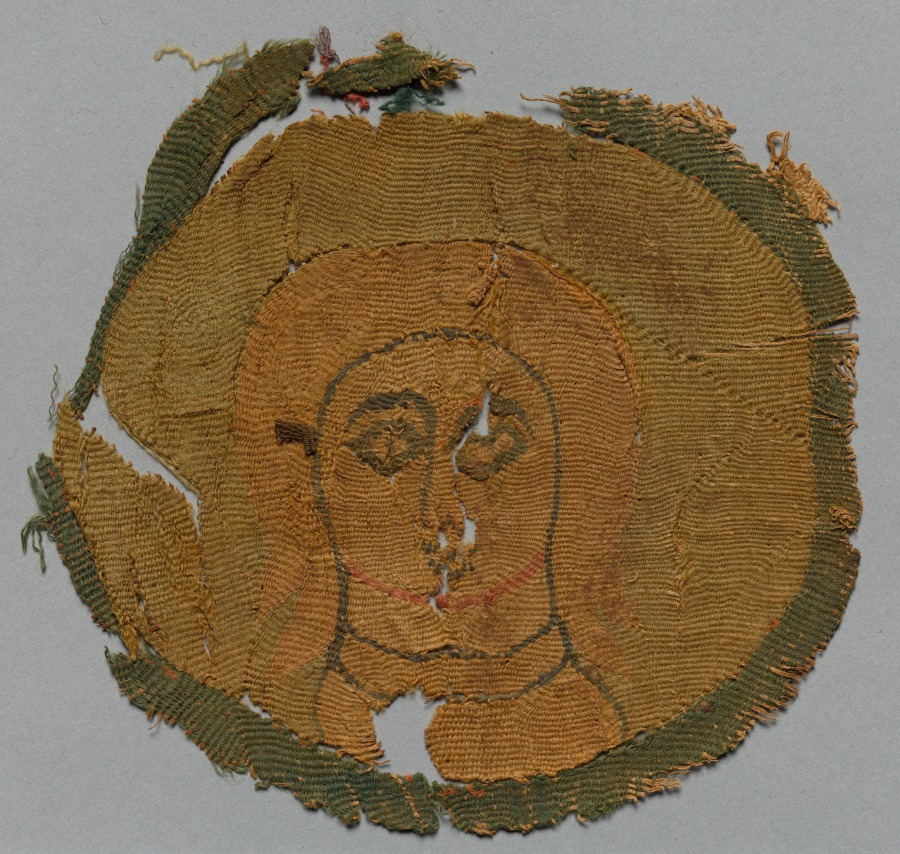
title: Fragment of a Roundel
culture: Egypt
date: before 1968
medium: Linen and wool: tapestry (originally inwoven in tabby ground)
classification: Textile